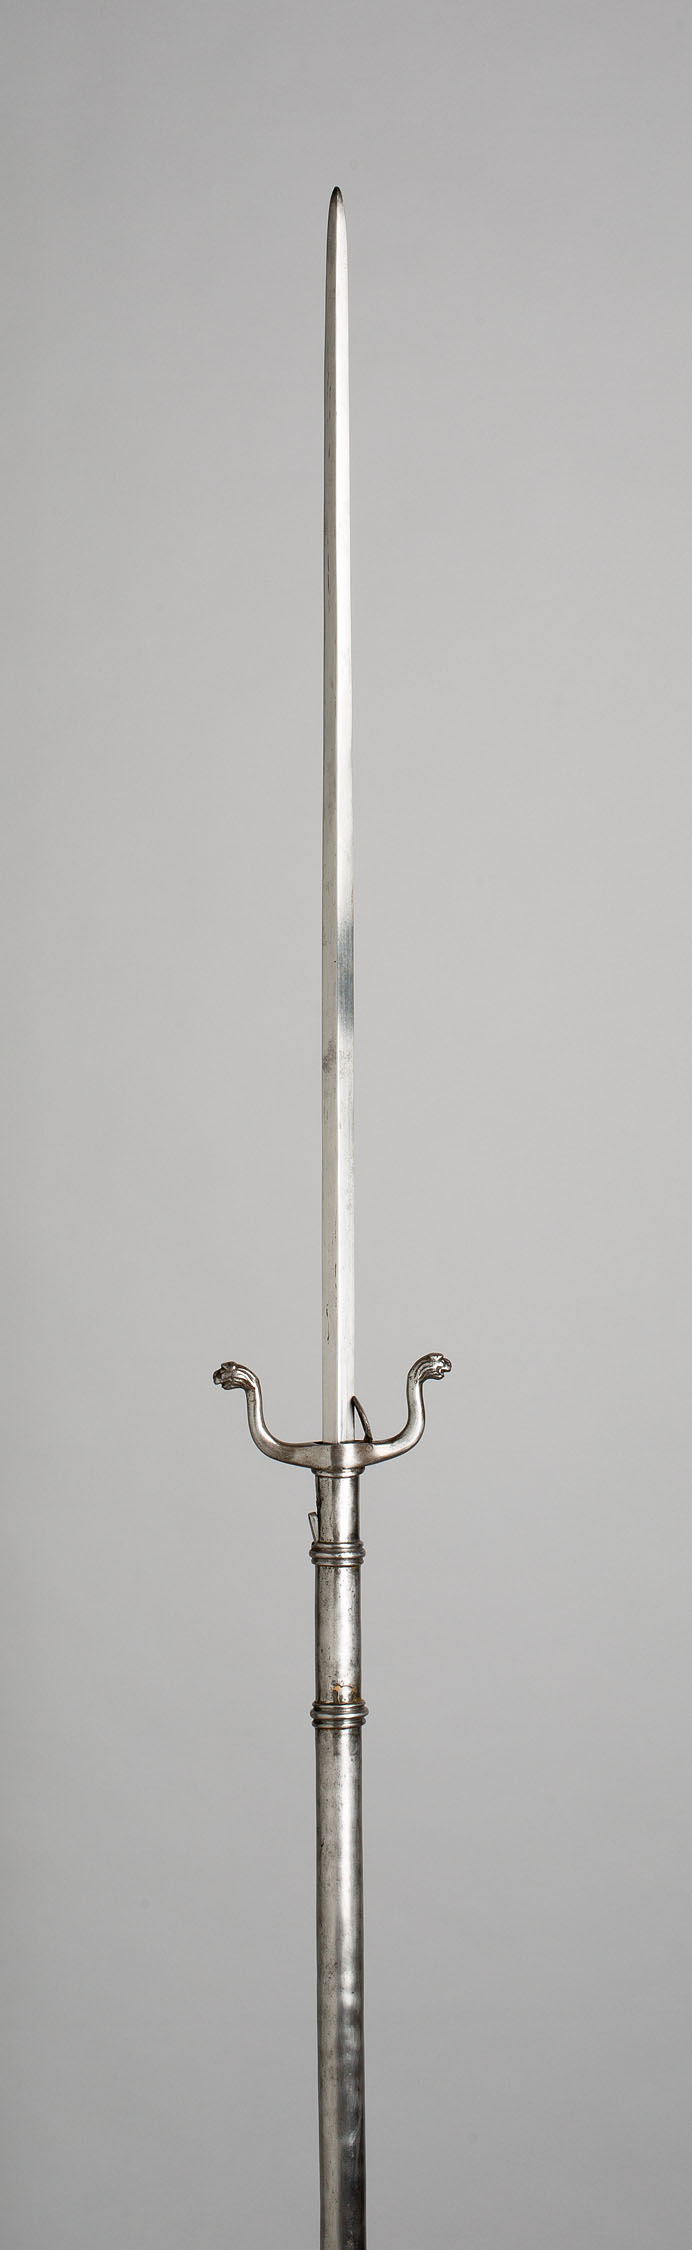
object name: Arms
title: Combined Brandistock and Musket Rest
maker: Italian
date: 17th century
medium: Steel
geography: Northern Italy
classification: edged weapon-staff; combination weapon; arms; arms and armor